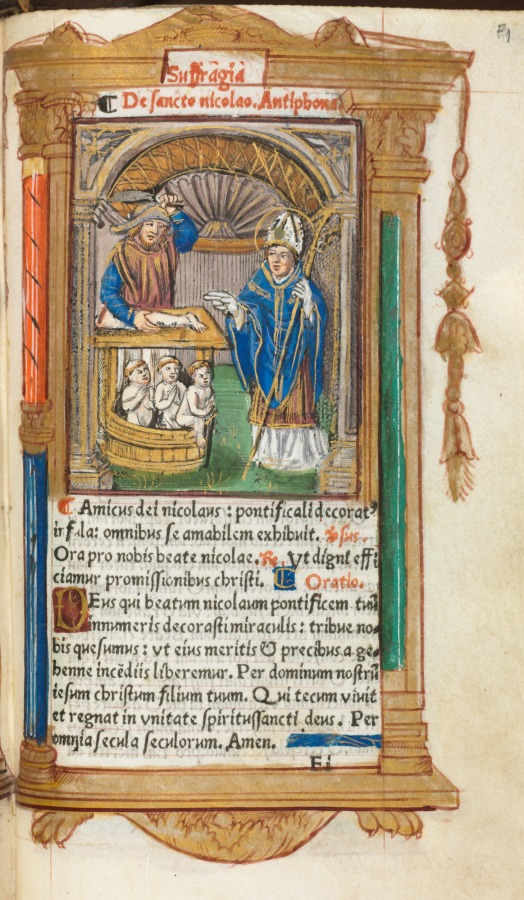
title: Printed Book of Hours (Use of Rome): fol. 105r, St. Nicholas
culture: France, Paris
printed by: Guillaume Le Rouge (French, Paris, active 1493–1517)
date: 1510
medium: 112 Printed folios on parchment, bound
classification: Bound Volume